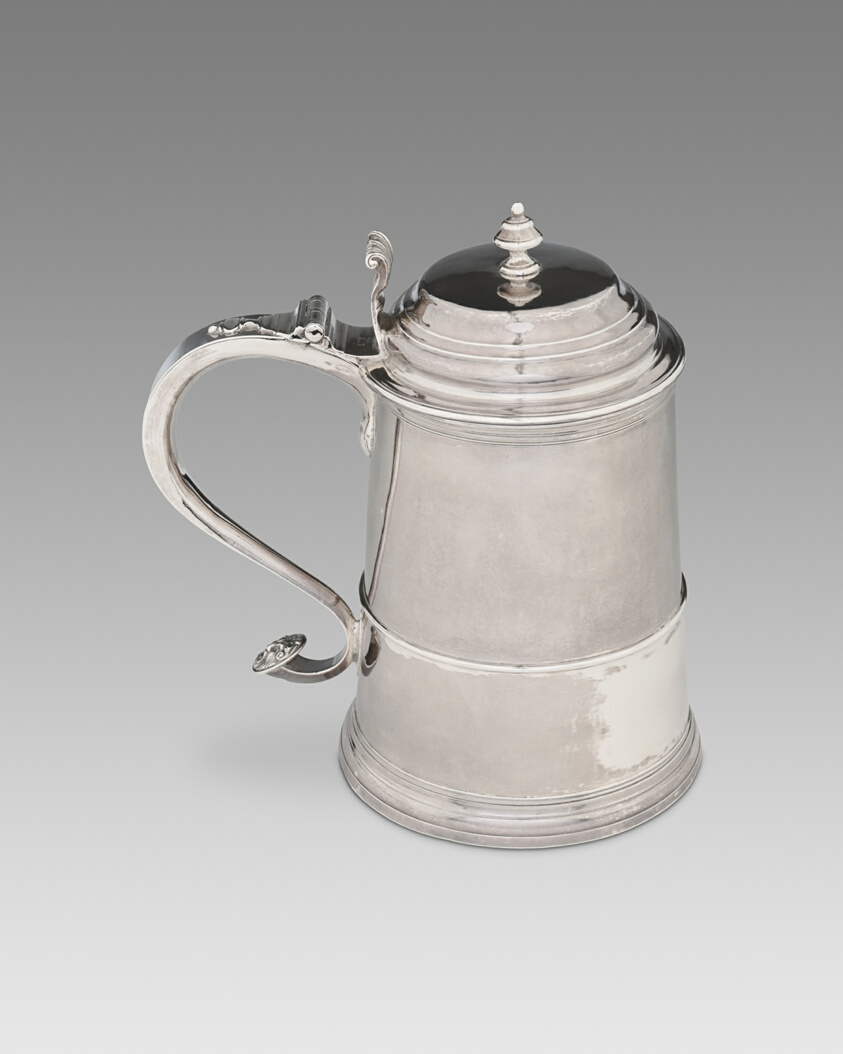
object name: Metalwork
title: Tankard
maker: John Burt; American, 1692/93–1745/46; Boston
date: c. 1729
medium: Silver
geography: Boston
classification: drinking vessel; silver; american decorative arts; american arts; decorative arts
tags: dining, drinking